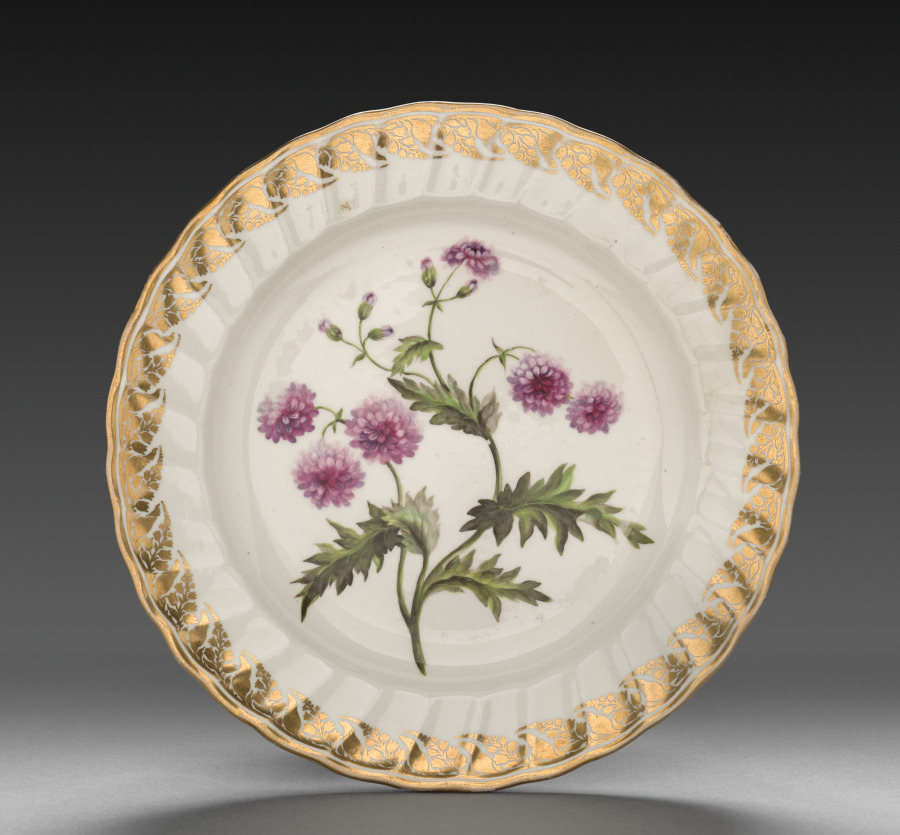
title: Plate from Dessert Service: Double Groundsell or Ragwort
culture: England, Derby, 18th century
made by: Derby (Crown Derby Period) (British)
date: c. 1800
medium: porcelain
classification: Ceramic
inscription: inscribed in blue on back: Senecia Elegans./Double Groundsell, or Ragwort./crown/crossed batons and dots/D/115.